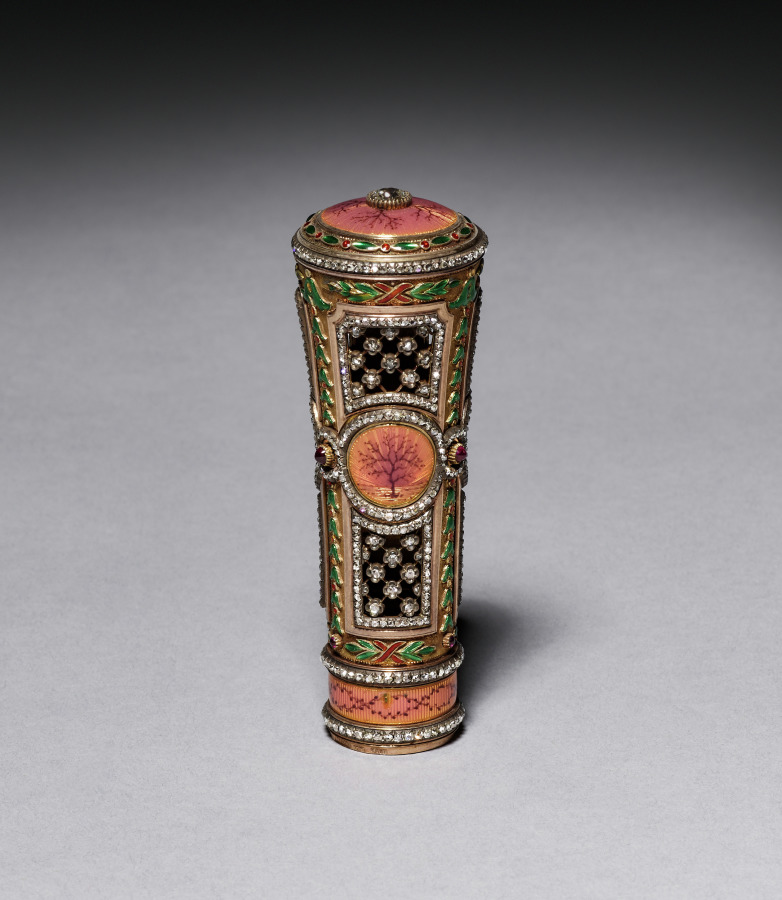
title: Parasol Handle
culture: Russia, St. Petersburg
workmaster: Michael Evlampievich Perchin (Russian, 1860–1903)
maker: House of Fabergé (Russian, 1842–1918)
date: c. 1886–1903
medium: Gold, enamel, diamonds, and platinum filigree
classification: Metalwork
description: Women devised many methods to protect themselves from the sun when strolling outside at the end of the nineteenth century. One constant barrier from the harsh rays was the daytime parasol which looked like an umbrella but was used strictly for shade. The House of Fabergé specialized in providing fashionable wealthy ladies with bejeweled handles such as this example, which could be screwed directly into the end of the parasol shaft when a more formal look was desired.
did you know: A wealthy lady around 1900 could unscrew her jeweled parasol handle and take it with her for safekeeping or swap it for another color.